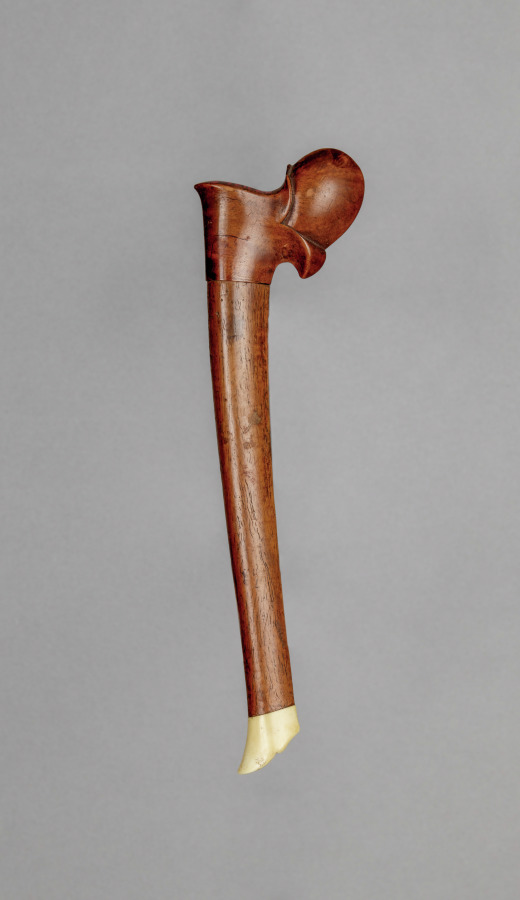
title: Wood Scabbard for a Knife (Kris)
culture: Indonesia or Malaysia, Early 20th century (?)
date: c 1900– 1925 ?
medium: wood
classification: Arms and Armor